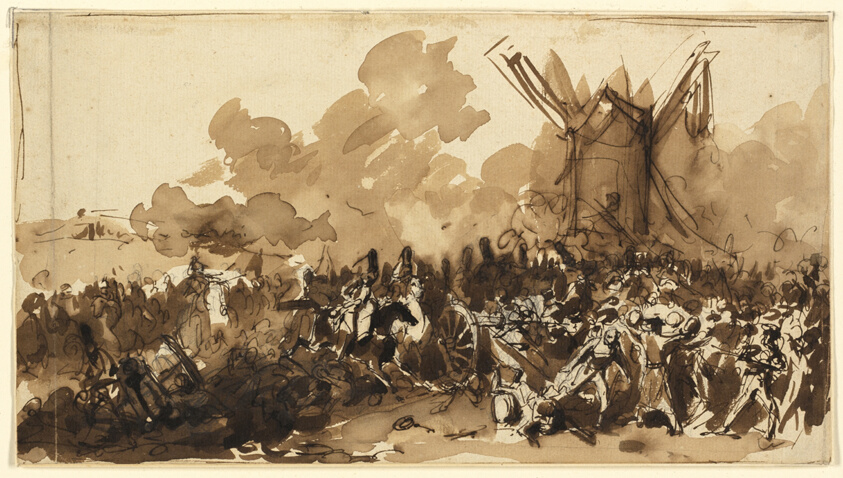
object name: Drawing and Watercolor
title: Study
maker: Denis Auguste Marie Raffet (French, 1804-1860)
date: 1833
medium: Pen and iron gall ink, with brush and brown wash, over graphite, on ivory laid paper, laid down on ivory wove paper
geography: France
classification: pen and ink drawings; drawings (visual works); prints and drawing